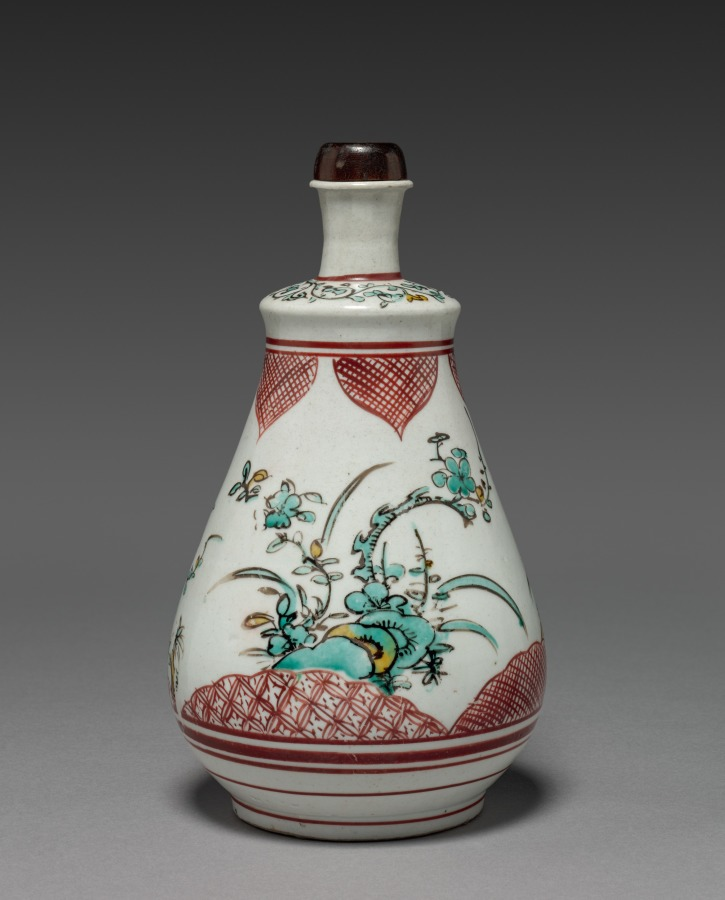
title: Wine Bottle with Plum and Pine Tree Design: Ko Imari Type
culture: Japan, Edo period (1615–1868)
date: late 1600s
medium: porcelain with underglaze enamel decoration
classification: Ceramic